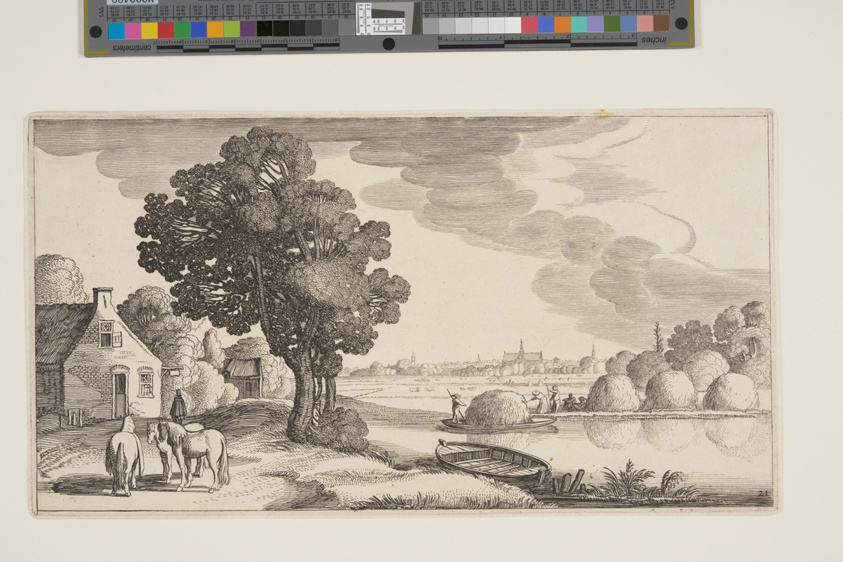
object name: Print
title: Transport of Hay on a River, from Landscapes (Playsante Lantschappen)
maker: Attributed to Claes Jansz. Visscher II (Dutch, 1586-1652); after Jan van de Velde II (Dutch, c. 1593-1641)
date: c. 1641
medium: Etching, with engraving, on ivory laid paper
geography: Netherlands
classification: etching; paper; print; prints and drawing